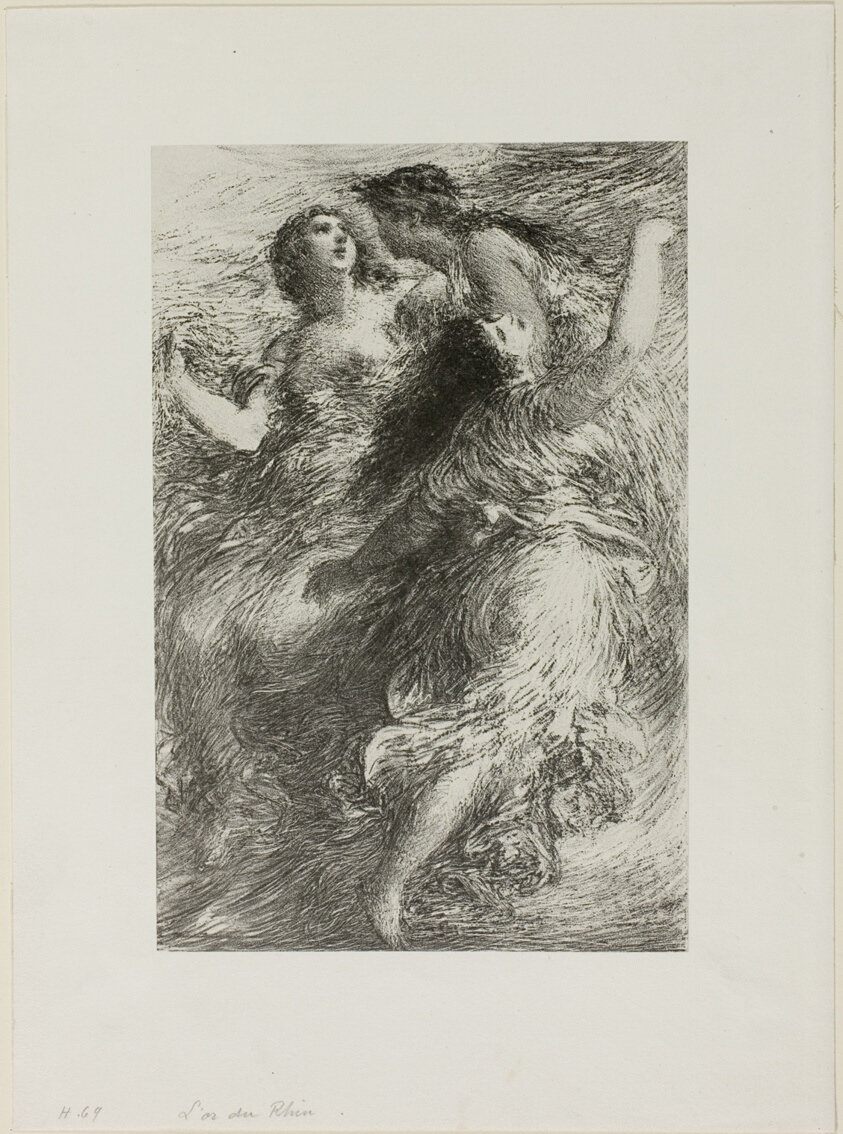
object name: Print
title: The Rhinegold: Scene I, The Rhinemaidens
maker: Henri Fantin-Latour (French, 1836-1904)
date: 1886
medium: Lithograph in black, with scraping on stone, on grayish-ivory China paper, laid down on off-white wove paper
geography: France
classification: lithograph; print; prints and drawing